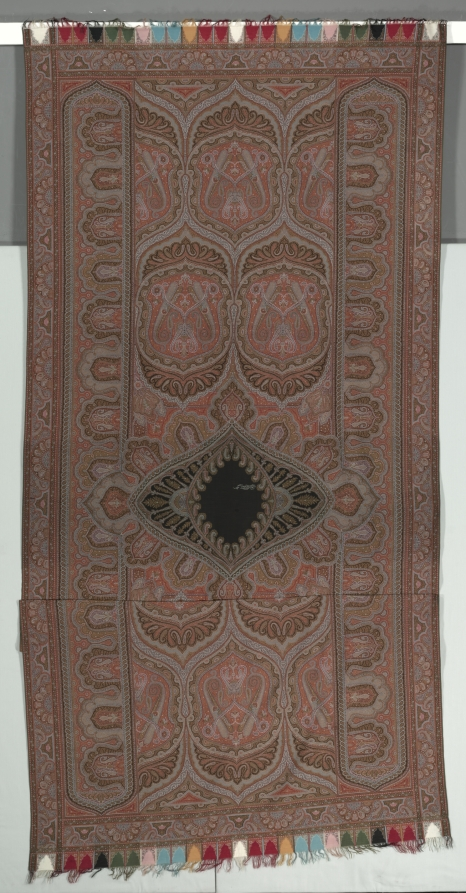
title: Long Shawl with Botehs, Black Center, and Lobed Arcades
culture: France, Paris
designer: Emile Frederic Herbert (French)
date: 1855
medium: supplemental weft pattern; silk?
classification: Textile